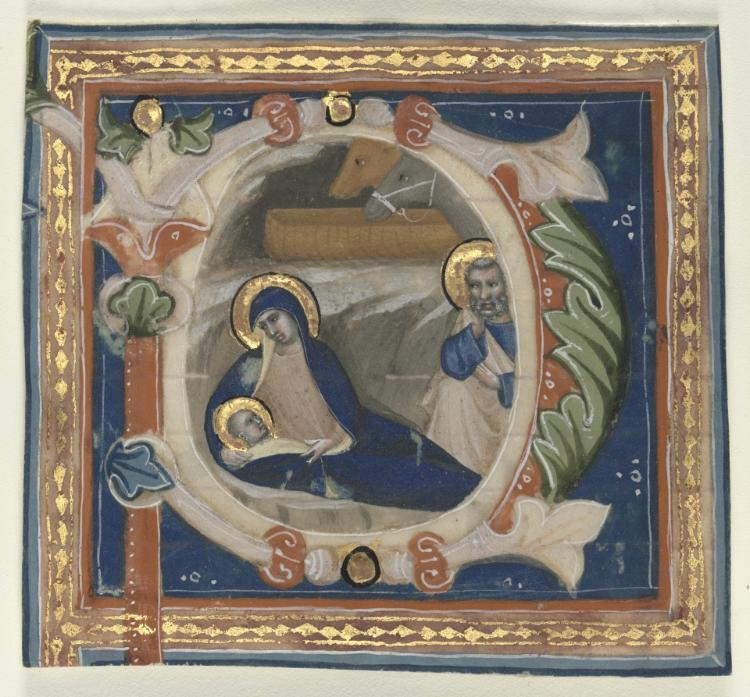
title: Historiated Initial (P) Excised from a Gradual: The Nativity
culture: Italy, Siena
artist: attributed to Lippo Vanni (Italian)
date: c. 1350–75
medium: ink, tempera, and gold on parchment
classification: Manuscript